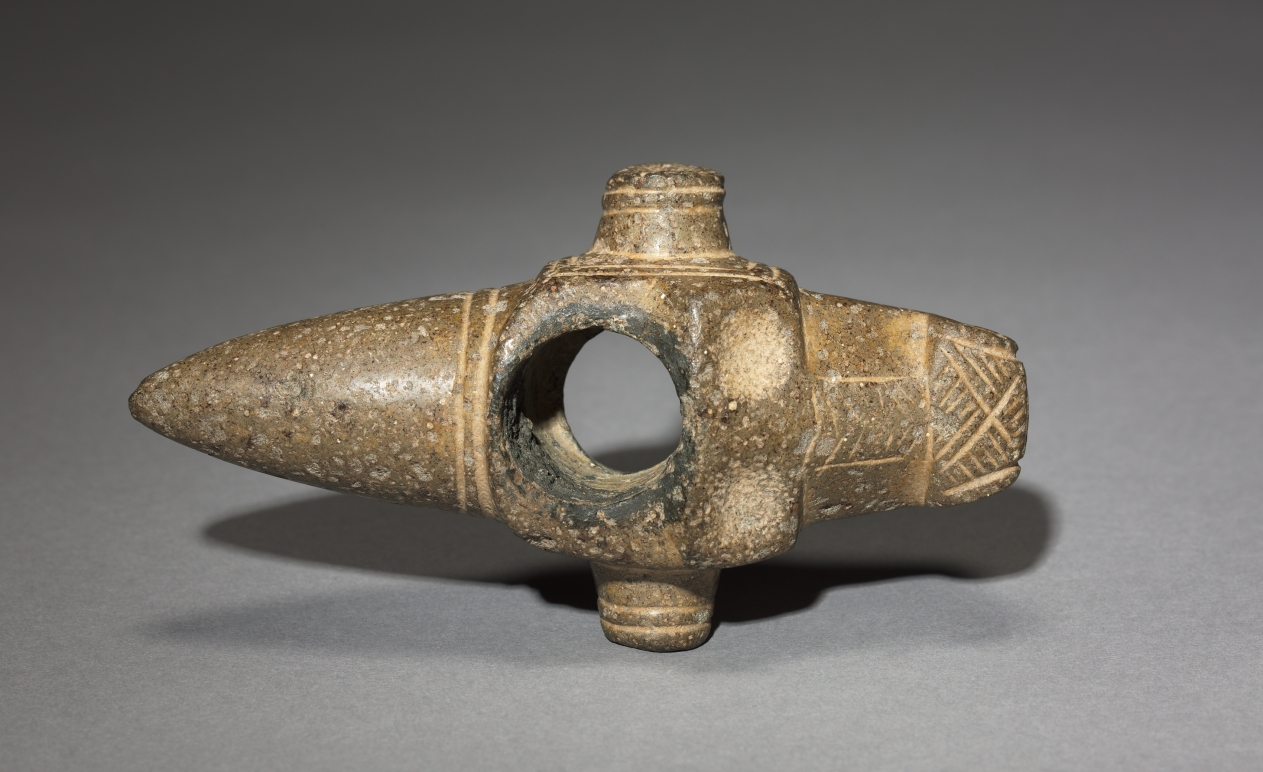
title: Mace Head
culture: Costa Rica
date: 300–500 CE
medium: pecked and polished gray stone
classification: Sculpture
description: Once mounted on wooden shafts, elaborately shaped mace (club) heads like this one probably were not used as weapons. Rather, they could have served as emblems of chiefly authority, group insignia, the heads of ceremonial weapons, or all three. They eventually were placed in elite graves. The back-curled nose on this example may refer to a crocodile or caiman.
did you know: In ancient Costa Rica, it was believed that the world rested on the back of a crocodile.